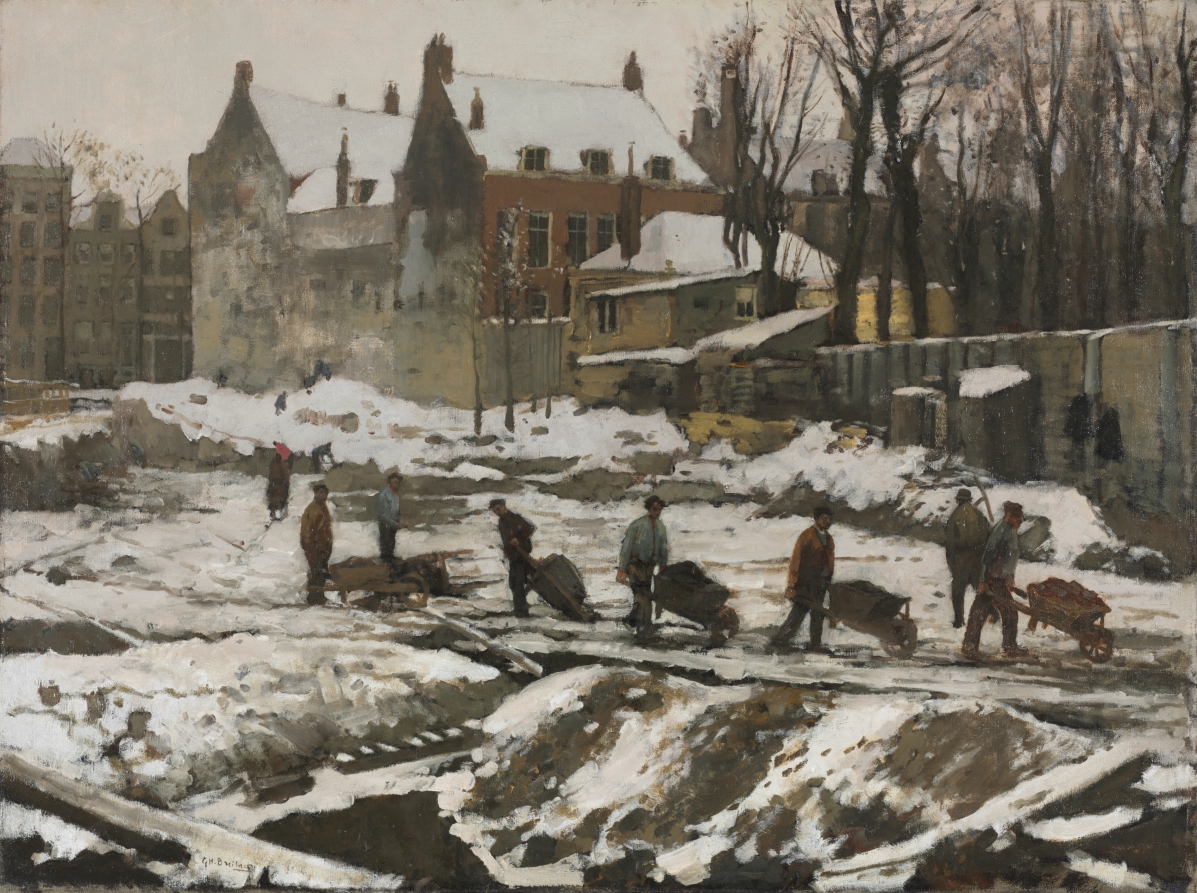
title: Construction Site in Amsterdam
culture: Netherlands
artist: George Hendrik Breitner (Dutch, 1857–1923)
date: c. 1902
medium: oil on fabric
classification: Painting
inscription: Signed bottom left corner: G. H. Breitner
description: A leader of the Dutch Impressionists, Breitner based this painting on a series of photographs he took of a construction site in Amsterdam. Although seemingly executed rapidly on site, the painting was in fact carefully composed in the studio. Aided by his own photographs and sketches, Breitner portrayed a city in transition. Like his friend Vincent van Gogh, Breitner admired naturalist literature and was determined to become a “painter of the people.”